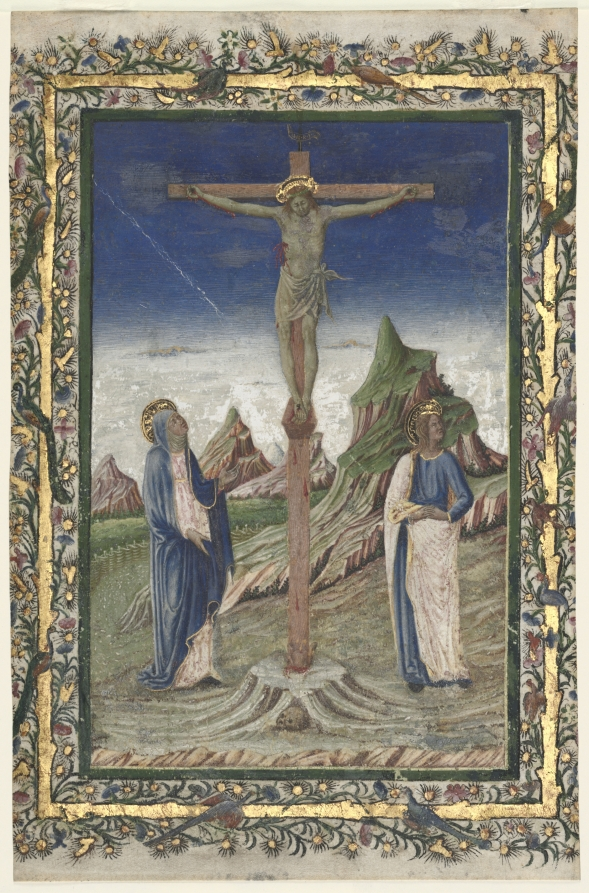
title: Single Leaf from a Missal: The Crucifixion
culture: Italy, Venice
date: late 1400s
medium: tempera and gold on parchment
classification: Manuscript